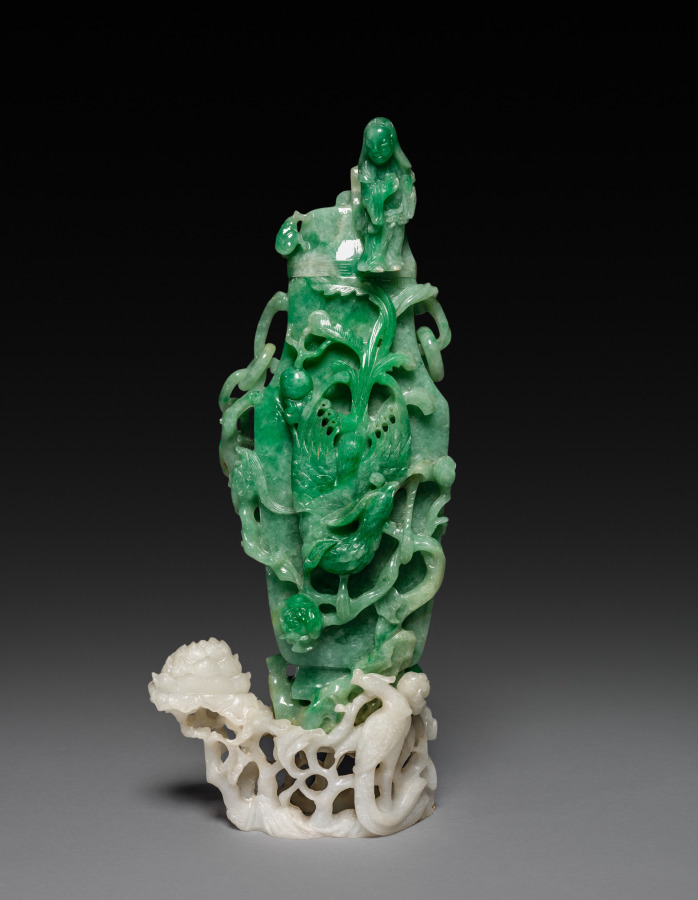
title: Three-Sectional Altar Group: Cylindrical Carving with Phoenix (lid)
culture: China, Qing dynasty (1644-1911)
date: 1644–1911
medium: jade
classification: Jade